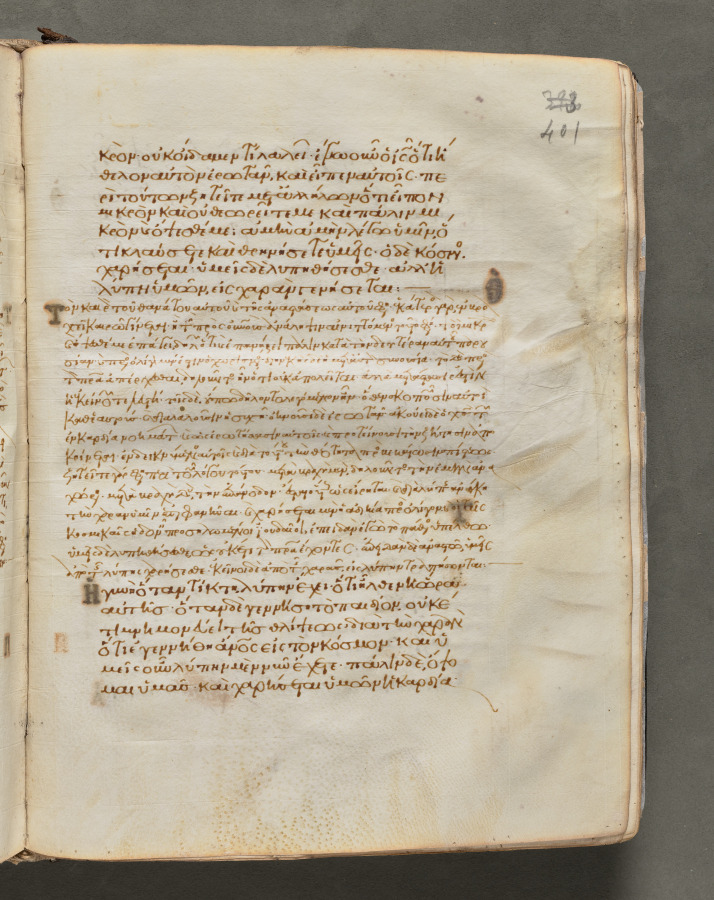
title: Text, folio 401 (recto), from a Gospel Book with Commentaries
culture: Byzantium, Constantinople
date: c. 1000–1100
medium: ink, tempera, and gold on vellum; leather binding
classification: Bound Volume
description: Each of the four gospels in this book opens on a page with brilliantly illuminated borders depicting the author of the text as well as birds—principally peacocks, symbols of the immortality of the soul—and fountains, representing the fountain of life and the salvation of the soul. This volume consists of 428 leaves with texts in Greek. Its level of sophistication suggests that it was probably written and decorated in a monastery in Constantinople.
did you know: Gospel books were carried in procession through Byzantine churches.